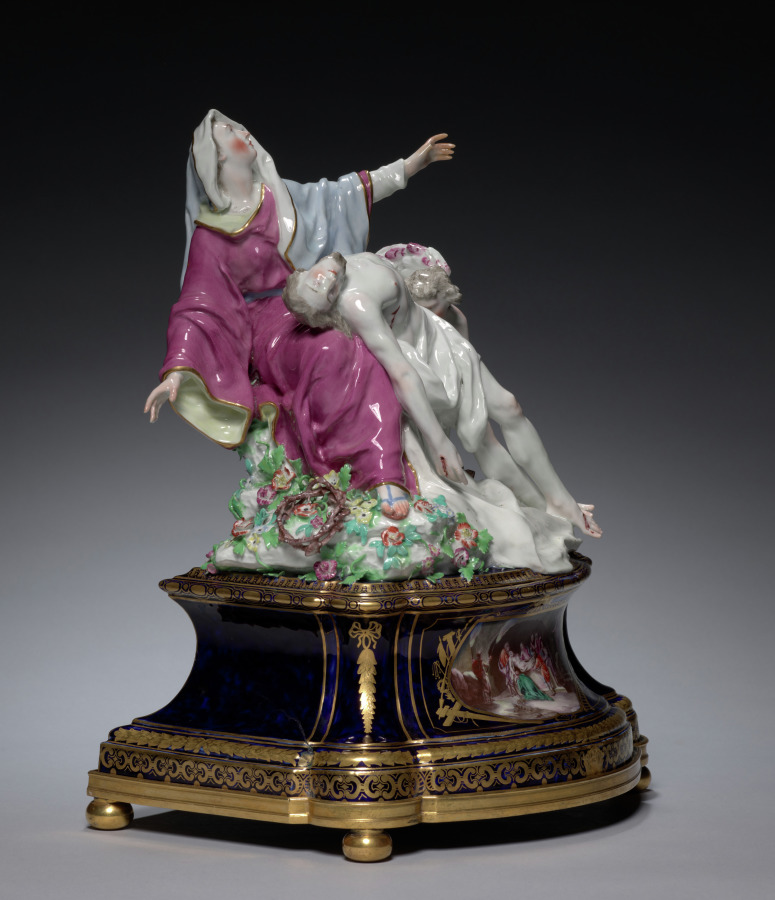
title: Figure of the Pietà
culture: England, London, Chelsea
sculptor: Joseph Willems (Flemish, 1715–1766)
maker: Chelsea Porcelain Factory (Britain, London, 1745–84)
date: c. 1761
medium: Soft-paste porcelain, painted in enamels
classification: Ceramic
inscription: Painted in gilt over the glaze at base of figure on the reverse: [a gold anchor]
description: The distinctively Roman Catholic subject of Mary cradling her son, the crucified Christ, suggests this figure was probably made for one of the aristocratic English families forced to practice their Catholicism in secret during the mid-1700s. Because of the laws banning Catholic worship in England, grand houses were often modified to include private chapels or rooms in private quarters where visiting priests delivered the sacraments in defiance of the laws favoring Protestant worship. A figure of this size and type likely would have served as an important devotional focal point within that context.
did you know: Only three examples of this figure by the Chelsea Porcelain Factory are known to exist.